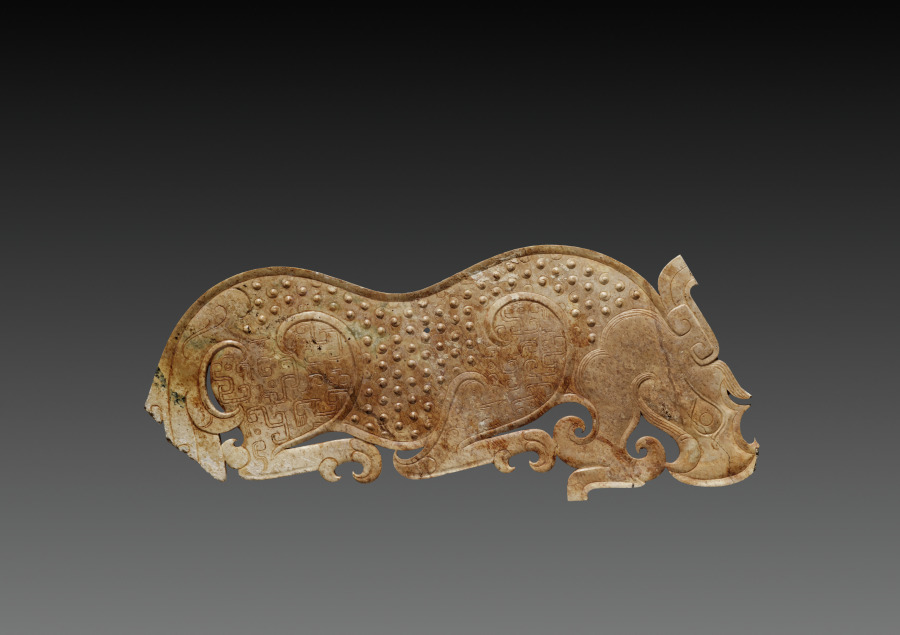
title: Jade Plaque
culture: China, Henan province, Eastern Zhou dynasty (770–256 BCE), Warring States period (475–221 BCE)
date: 475–221 BCE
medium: nephrite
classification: Jade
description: This beautiful pair of late Eastern Zhou openwork jade plaques illustrate a level of creativity and technical achievement that was unequaled before or since. Taking the shape of a pair of fantastic creatures, they are at once tigerlike, rhinolike, and dragonlike. Their strong silhouettes are marked with shallow relief bands, and their subtly swelling embellished surfaces are finished to the same degree on both sides.